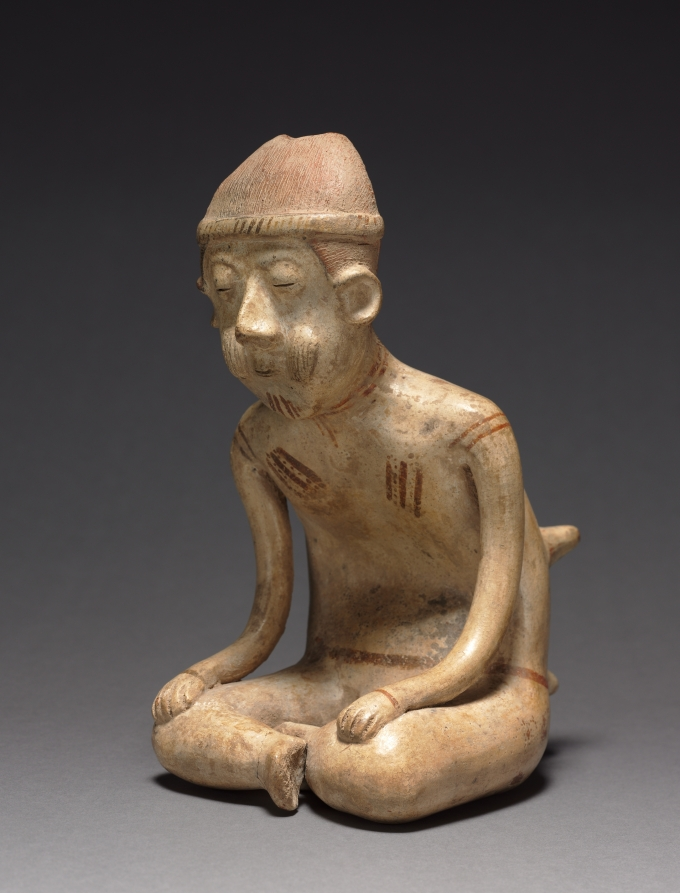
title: Seated Male Figure with Backrest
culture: Mexico, Nayarit, Chinesco style, Type E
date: 100 BCE–300 CE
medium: pottery with burnished cream and red slips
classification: Sculpture